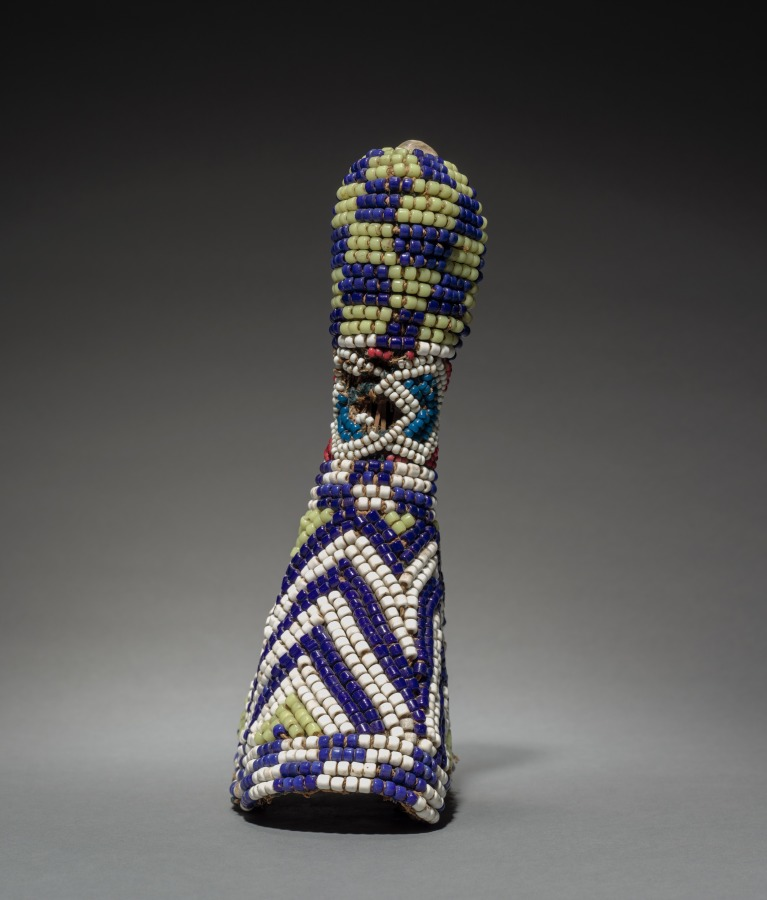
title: Beaded Hat or Headpiece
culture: Africa, Central Africa, Democratic Republic of the Congo, Kuba, 20th century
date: early 1900's?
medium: Glass beads, cloth, plant fiber, and cowrie shells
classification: Garment